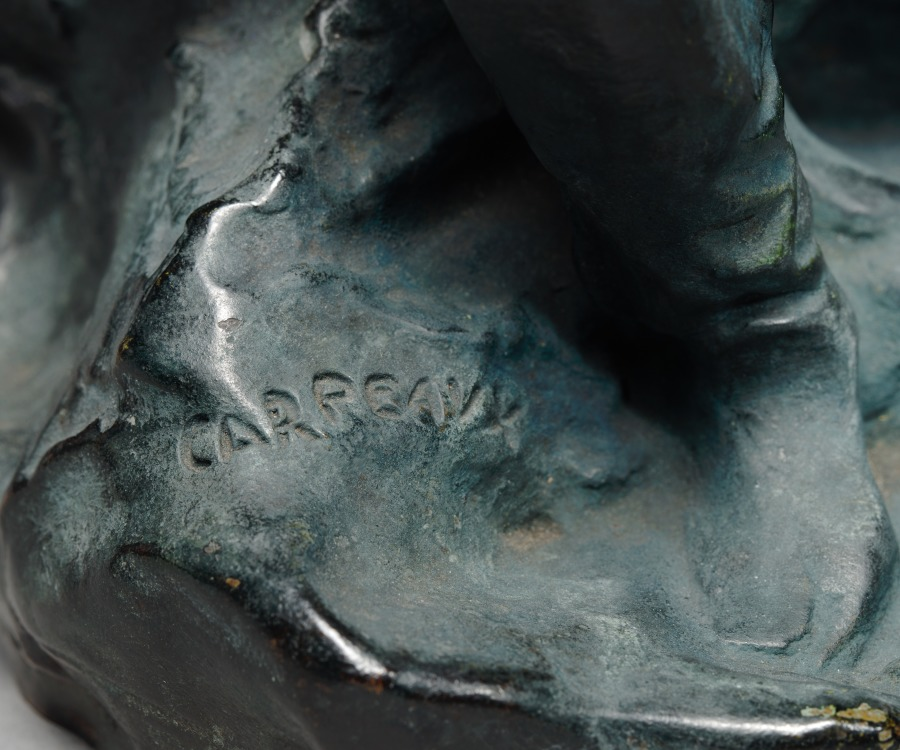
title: Napoleon on St. Helena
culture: France, 19th century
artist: Jean-Baptiste Carpeaux (French, 1827–1875)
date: c. 1860–1870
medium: bronze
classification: Sculpture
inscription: Carpeaux, probably in the wax model, left of Napoleon's foot; on back, an inscription, perhaps the foundry name, has been obliterated with tool marks.